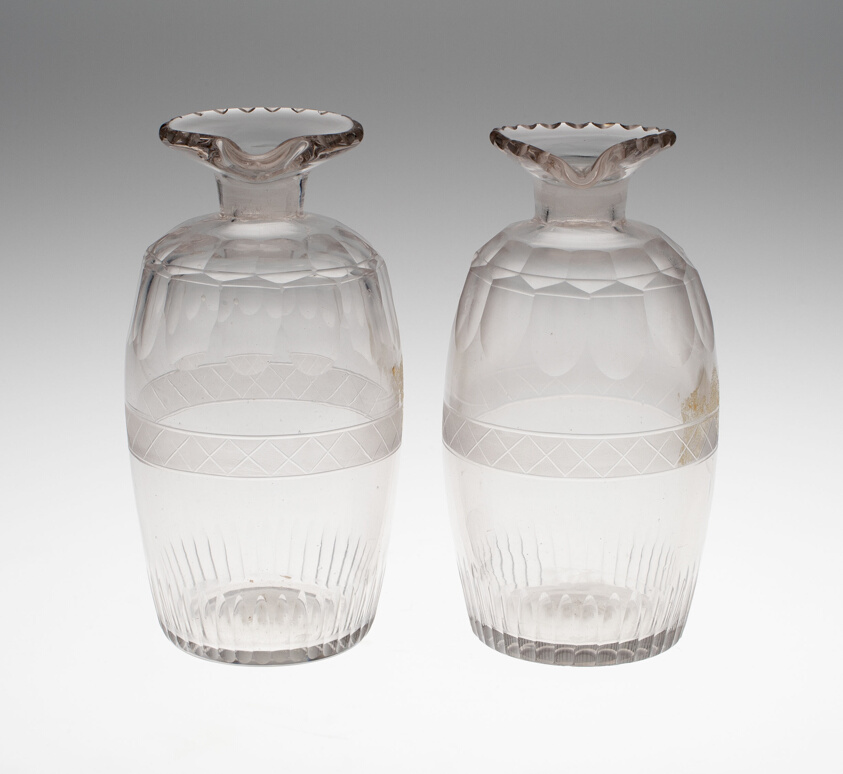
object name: Glass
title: Pair of Cruets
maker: England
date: c. 1800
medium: Glass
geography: England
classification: glass; european decorative arts